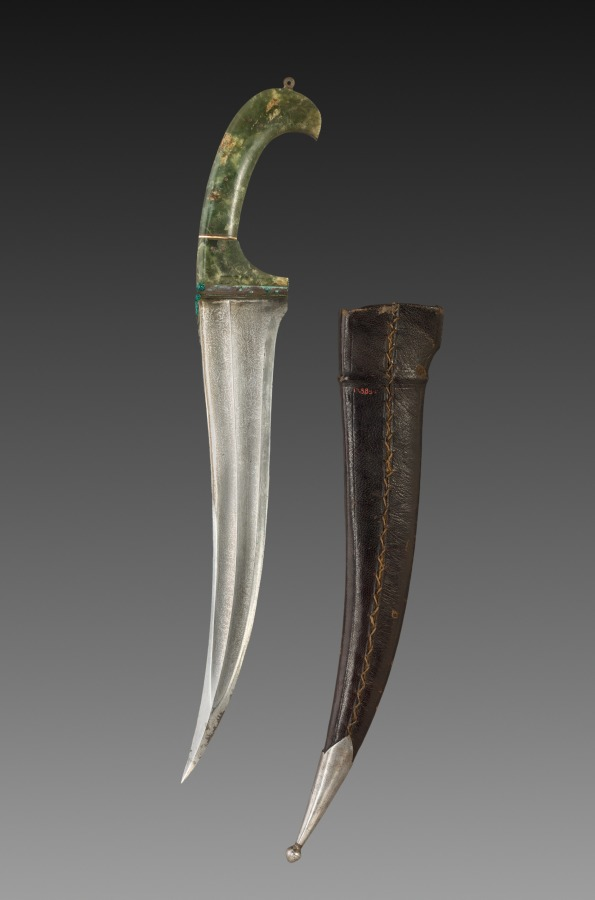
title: Dagger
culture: India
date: 1800s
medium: iron with bone and silver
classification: Arms and Armor